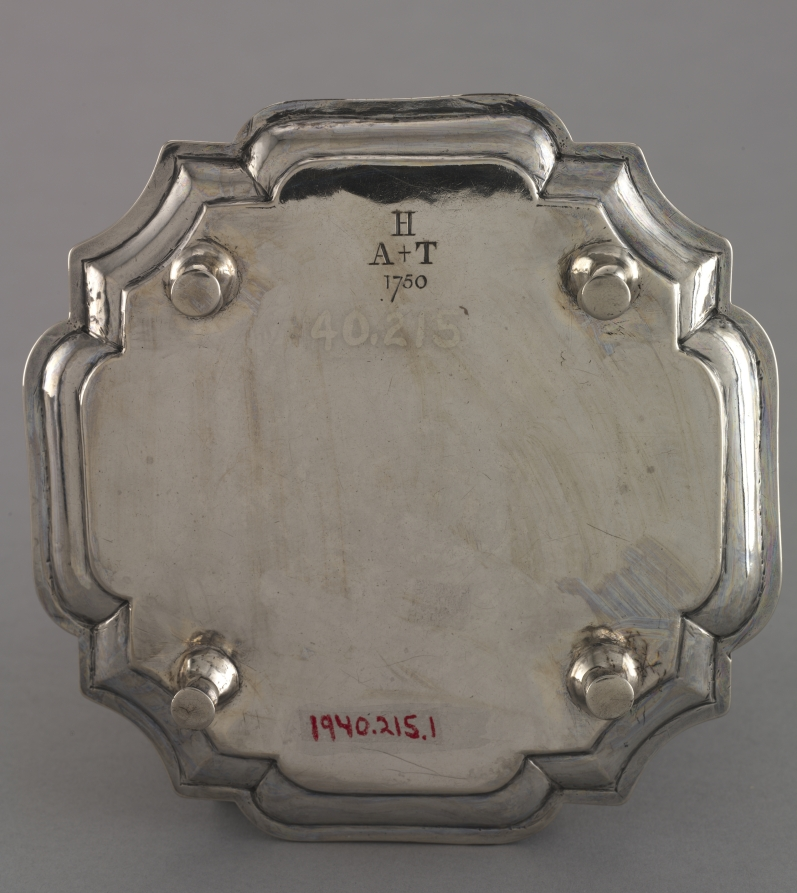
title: Salver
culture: America, Massachusetts, Boston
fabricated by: Jacob Hurd (American, 1702–1758)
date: 1740–50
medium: silver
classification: Silver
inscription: engraved: H over A + T over 1750 in shaded block letters underneath each salver.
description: The coat of arms is that of the Hastings family, the original owners of these serving pieces.